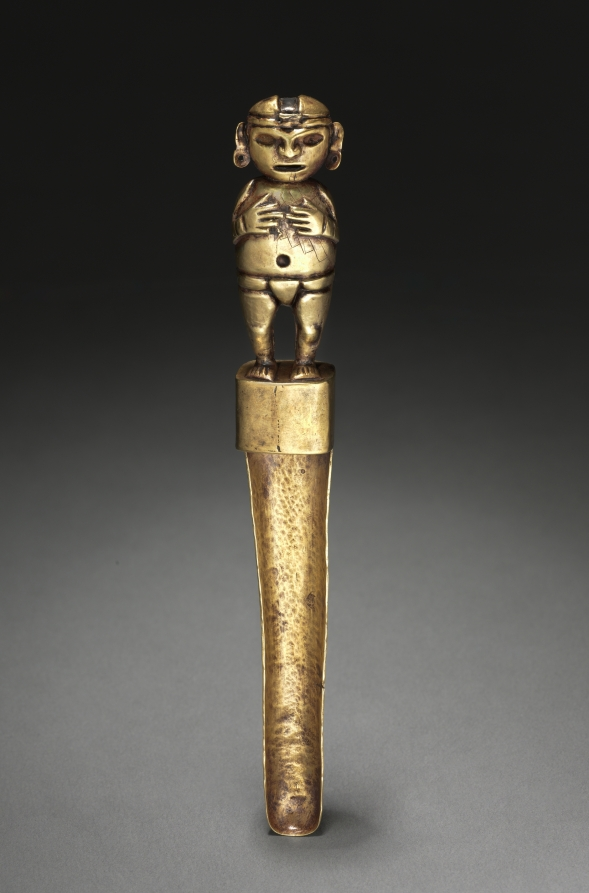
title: Spoon with Human Figure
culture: Peru, North Highlands, Chavín de Huantar(?), Chavín style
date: c. 500–200 BCE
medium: hammered and cut gold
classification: Metalwork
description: There seems to be a link between Chavín religion and appearance of the Andes’ first large precious-metal objects, made using revolutionary new metallurgical processes. Chavín may have developed these technical innovations to express the inexpressible, the "wholly other" nature of its religion. In many areas, elite men and women wore the ornaments as emblems of their ties to this religion, and eventually were buried with them. These 16 objects, along with three others not in the museum’s collection, are said to have come as a group from Chavín itself.